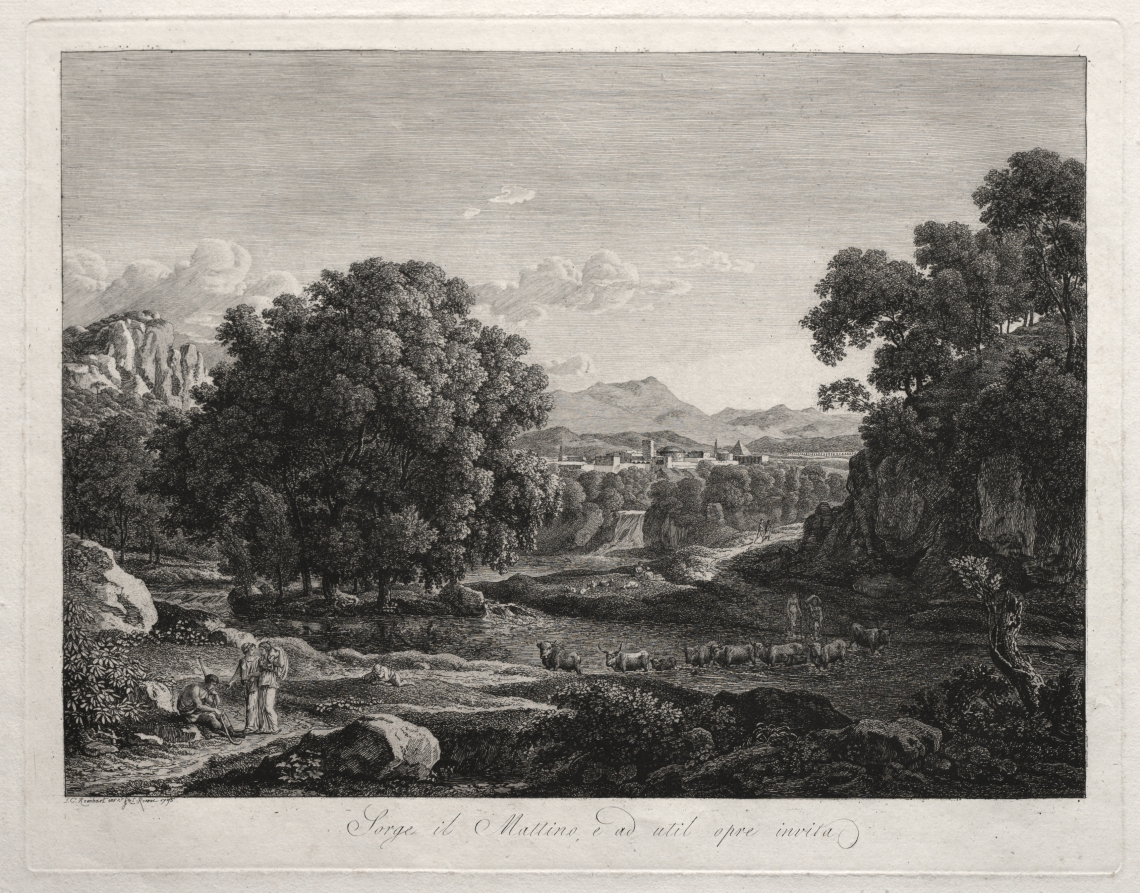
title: Heroic Landscape: Cattle Crossing the River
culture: Germany, 19th century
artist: Johann Christian Reinhart (German, 1761–1847)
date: 1795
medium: etching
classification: Print